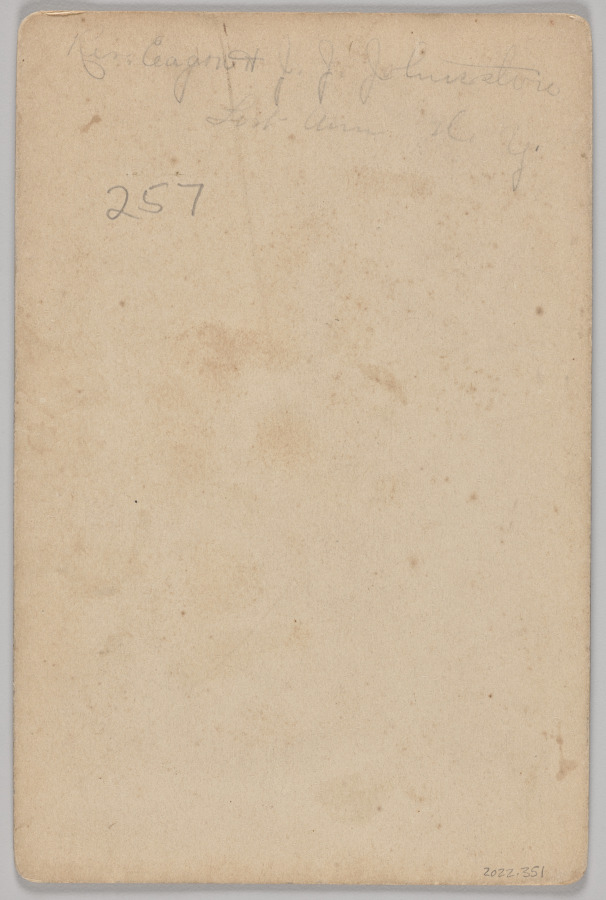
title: Untitled (seated portrait of two men, one with a book, the other reading a magazine)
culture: America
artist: A.H. Fell (American, 19th century)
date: 1880s-1890s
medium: albumen print, cabinet card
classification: Photograph